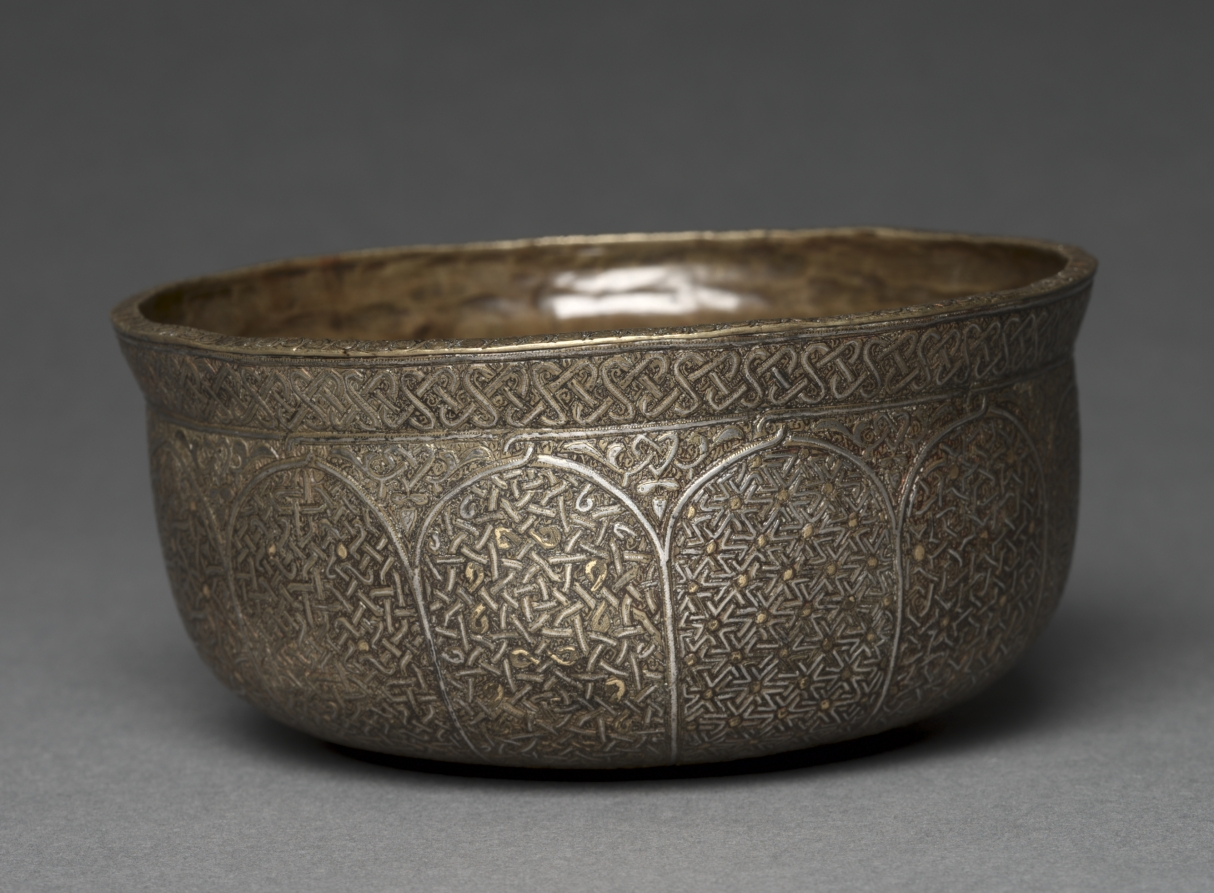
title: Bowl with Geometric Designs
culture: Syria, Damascus, Burji Mamluk period, 15th Century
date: 1450–1500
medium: sheet brass, inlaid with silver and gold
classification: Metalwork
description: This inlaid bowl has interlacing geometric designs in 12 arched panels that radiate from a star on the base. A pinwheel of six fish is engraved in the interior. Scholars recently reattributed them to Islamic manufacture, possibly for export to Europe.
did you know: The bowl's decorative panels contain six different geometric designs, each appearing twice, in opposing panels.